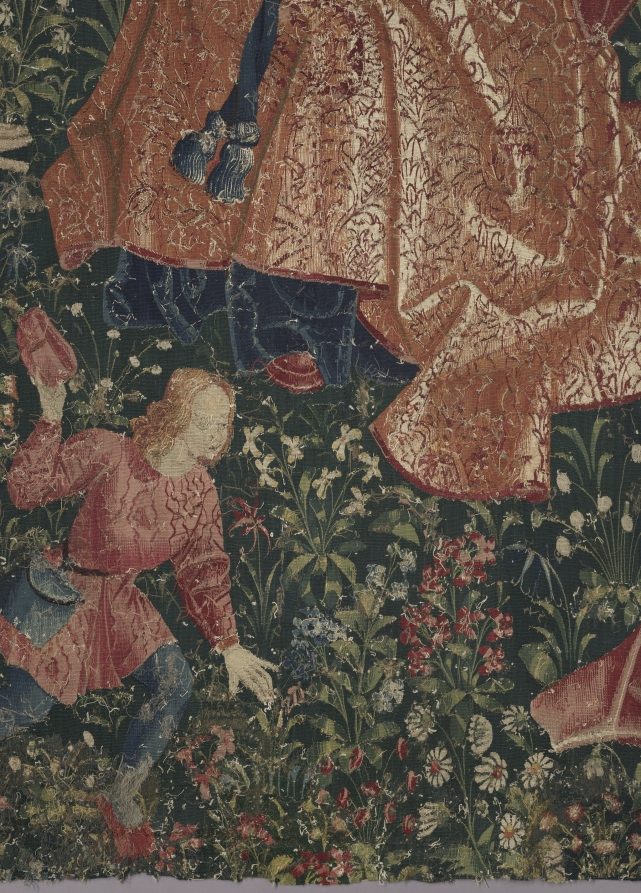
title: Youth (from Chateau de Chaumont set)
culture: France, Lyon(?), early 16th century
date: 1512–15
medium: silk and wool; tapestry weave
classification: Tapestry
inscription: French verse in Gothic letters translates as follows: Youth triumphs while its heart is healthy, And when it seems to hold all in its hand. But this triumph is without eternity. Here one sees the example full well: Those who are happy hide death in thier heart. Let the young heed this warning.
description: Louise of Savoy (1476-1531), queen mother of King Francis I, is depicted here in a sumptuous brocaded velvet in the center. She addresses youthful figures including Éléonore, Pierre Sala’s daughter who is facing her future husband, Hector. On the right, King Louis XII (died 1514) stands in front of the Chateau Langais where he had married Anne of Brittany. Above is Hector’s deceased father with a partially concealed skull under his robe, while a woman expresses surprise at the sight. The verse in Old French at the top states that youthful happiness is not eternal: Youth makes sounds as long as its heart is healthy, And thinks that it holds all in its hand. But this triumph is not eternal. Here you see clearly an example: He that is happy has death in his breast. Of this you people should take note.